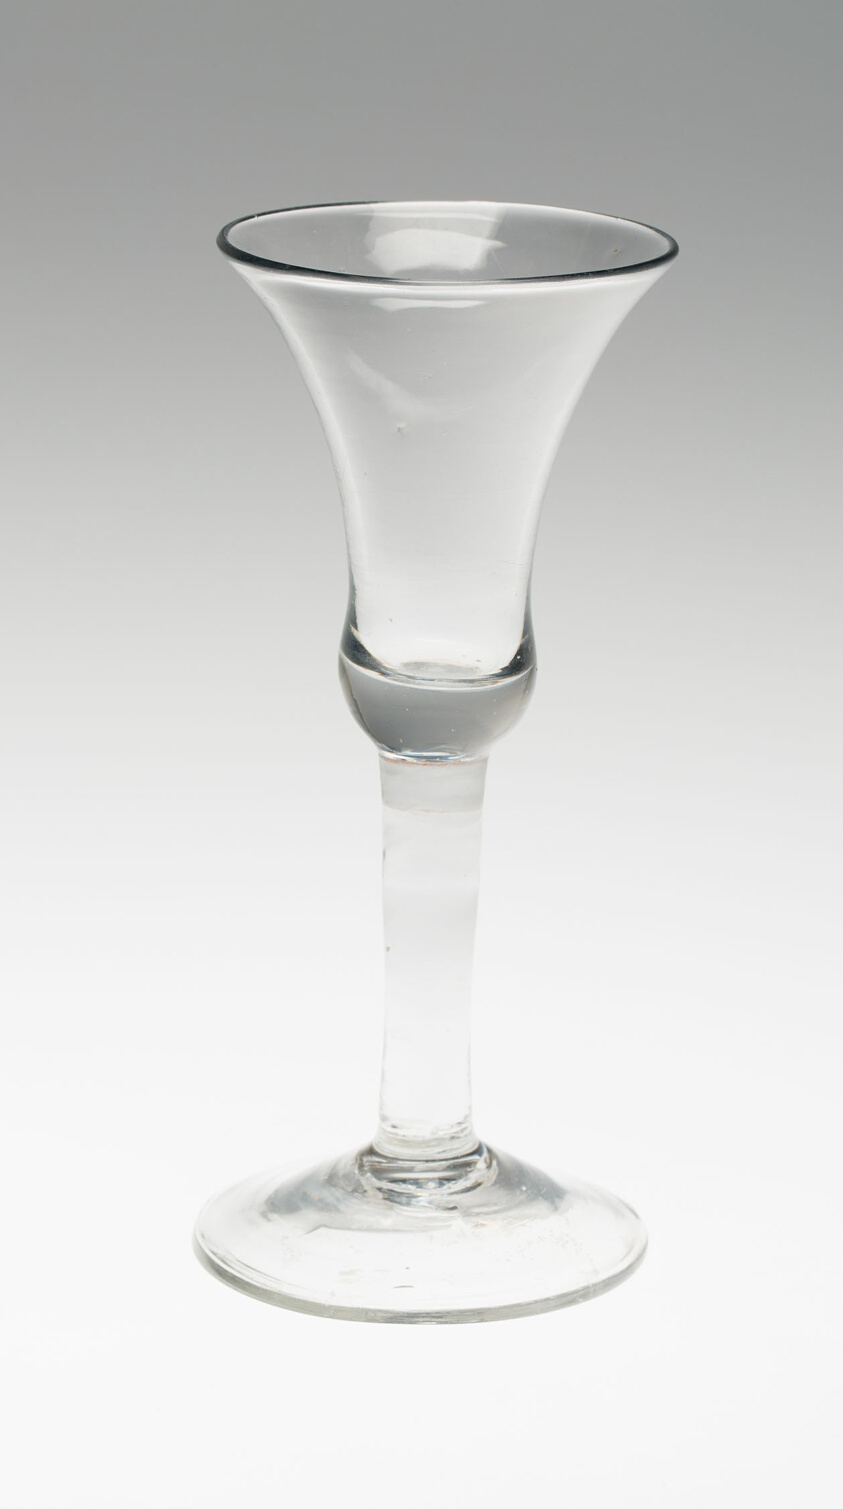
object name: Glass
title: Wine Glass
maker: England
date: c. 1780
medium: Glass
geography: England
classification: drinking vessel; glass